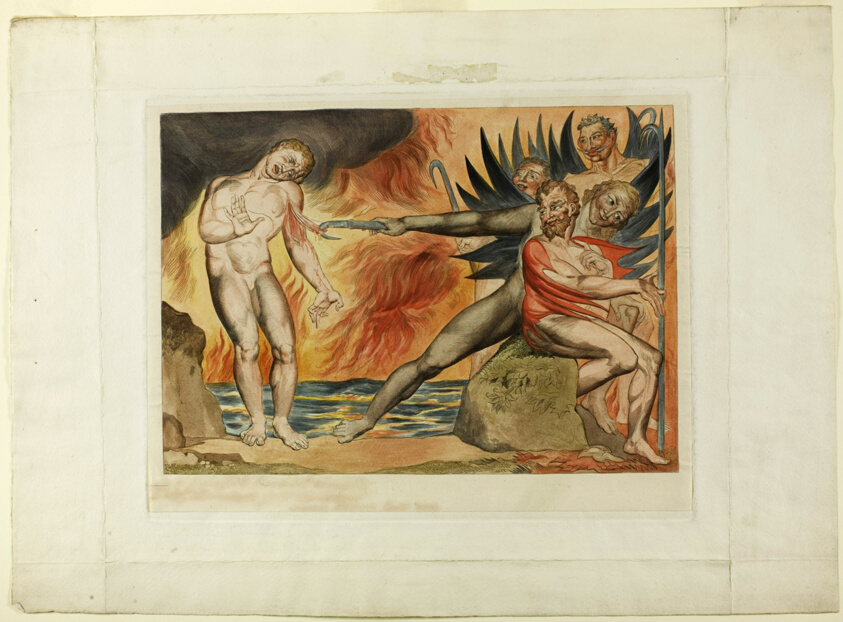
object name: Print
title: The Circle of the Corrupt Officials; the Devils Tormenting Ciampolo. Inferno, canto XXII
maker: William Blake (English, 1757-1827)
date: 1827, printed c. 1892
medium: Hand-colored engraving on India paper, laid down on wove paper (chine collé)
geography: England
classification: engraving; paper; print; prints and drawing